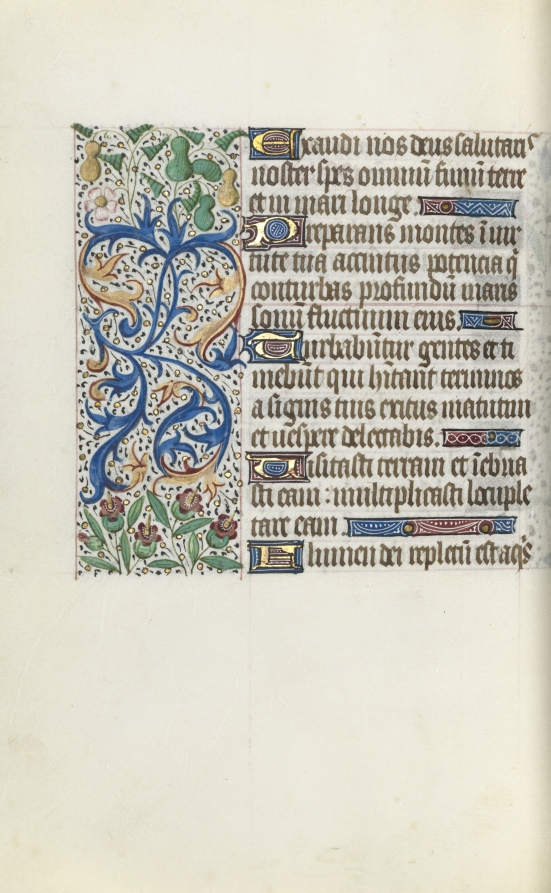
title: Book of Hours (Use of Rouen): fol. 136v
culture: France, Rouen, 15th century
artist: Master of the Geneva Latini (French, active Rouen, 1460–80)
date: c. 1470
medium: ink, tempera, and gold on vellum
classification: Bound Volume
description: In the late 1400s and early 1500s Rouen was an established and important center of book production. The city’s cathedral had a wealthy chapter that spent large sums of money to commission books and to maintain its extensive library. The stationers and booksellers would have likely been concentrated in or near the cathedral precinct. This artist, named after a manuscript now in Geneva, was Rouen’s principal illuminator during the second half of the 1400s.